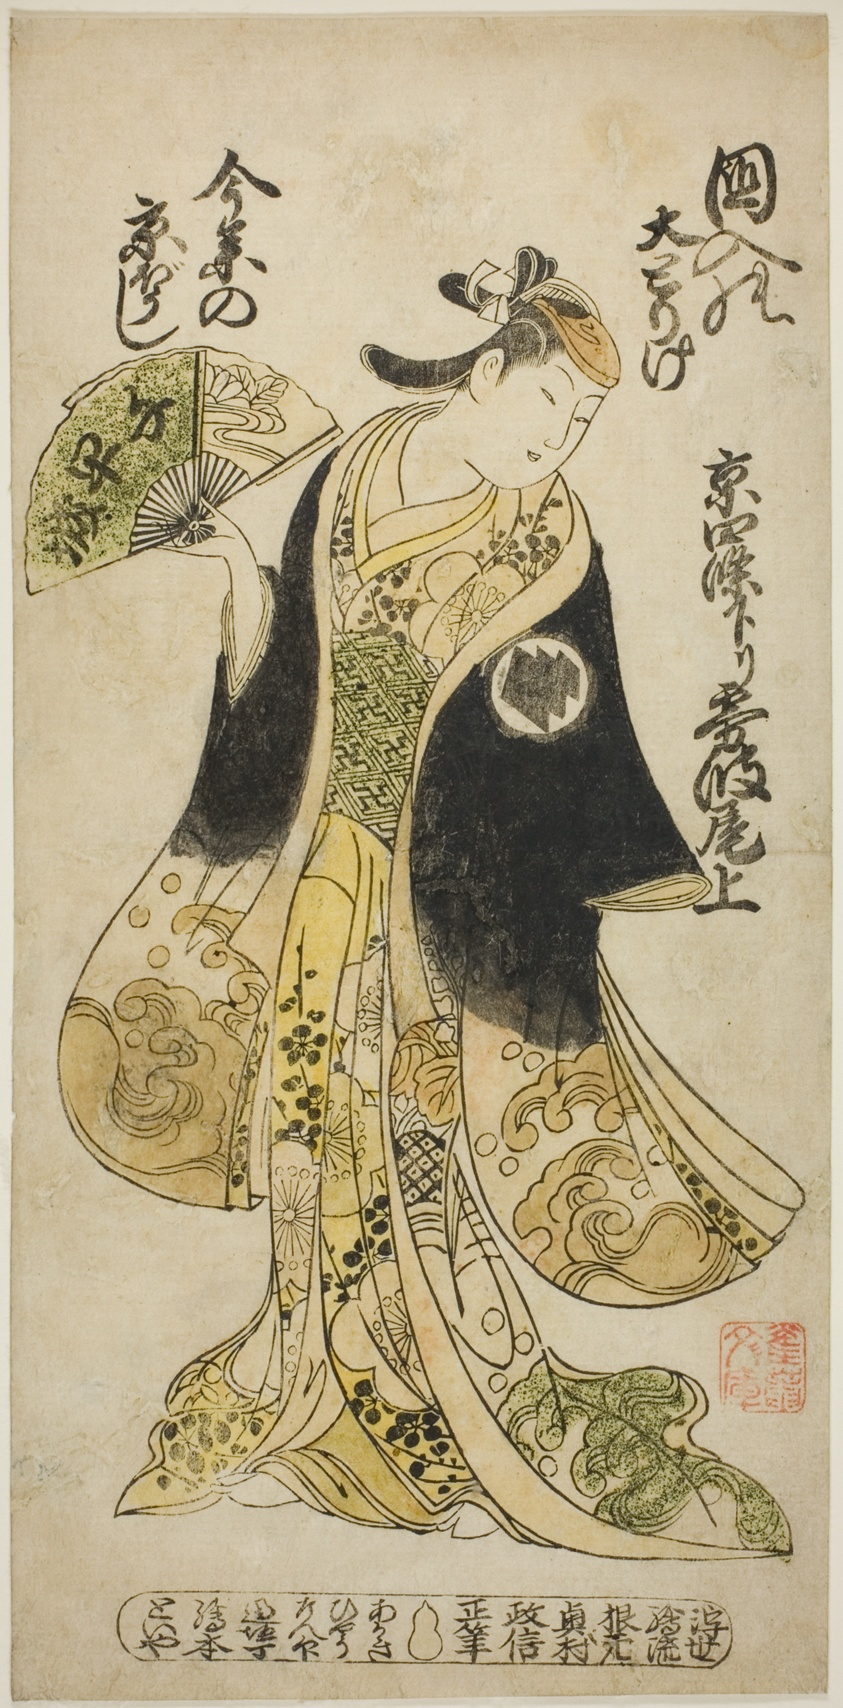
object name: Print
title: The Actor Kirinami Onoe as Osasa in the play "Hachijin Taiheiki," performed at the Nakamura Theater in the eighth month, 1727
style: Japanese (culture or style)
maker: Okumura Masanobu (Japanese, 1686-1764)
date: 1727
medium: Hand-colored woodblock print; hosoban, urushi-e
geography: Japan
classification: woodblock print; print; asian art